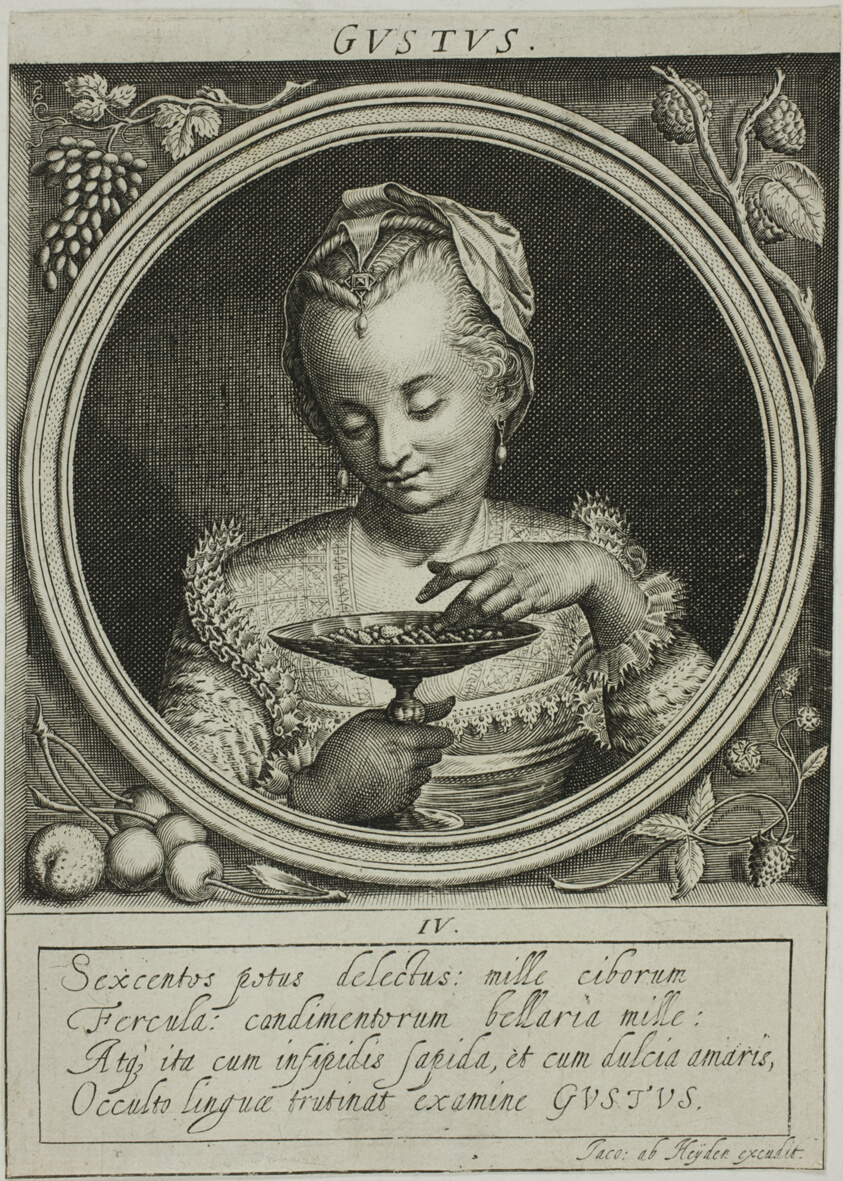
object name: Print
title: Taste, plate four from The Five Senses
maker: Jacob van der Heyden (Flemish, 1573-1645)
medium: Etching and engraving in black on ivory laid paper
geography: Flanders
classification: etching; print; prints and drawing